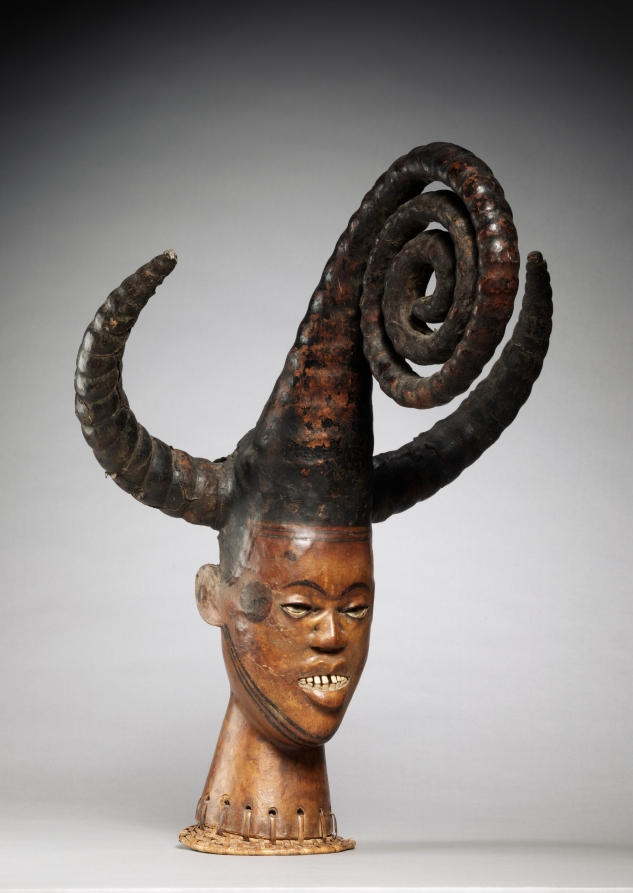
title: Headdress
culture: Africa, West Africa, Nigeria, Ejagham-style maker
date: early 1900s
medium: Wood, rawhide, cane, paint, bone or ivory, natural fiber, and metal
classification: Mask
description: Headdresses or crest masks made of antelope skin stretched over a carved head are a distinctive art form of the Cross River region in southeastern Nigeria and western Cameroon. This female evocation of ideal feminine beauty was most probably worn by an Ejagham woman in the context of a female society called Ekpa, which was responsible for the education of girls in preparation for marriage.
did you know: The headdress represents a girl that evokes ideal female beauty and is ready for marriage. The depicted hairstyle was worn during the coming-out ceremony following the girls’ seclusion.